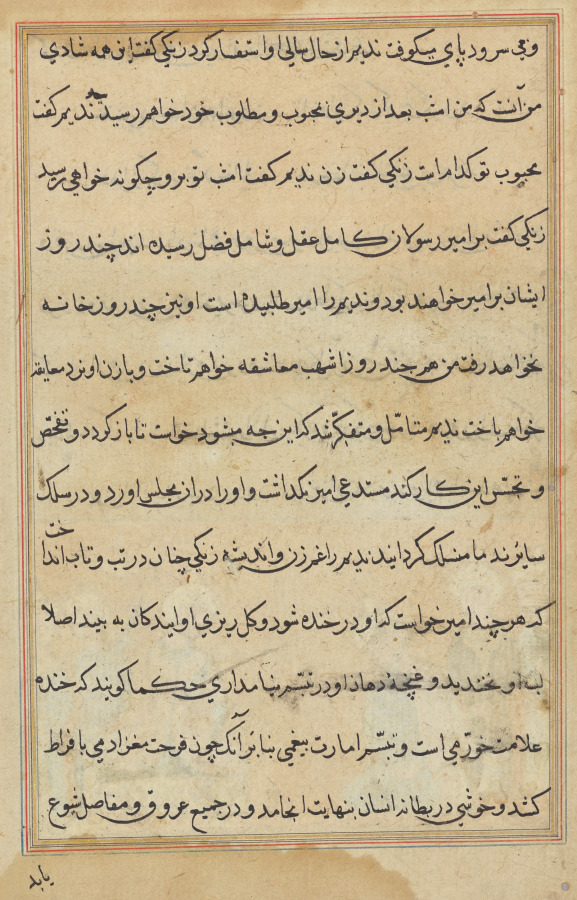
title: Page from Tales of a Parrot (Tuti-nama): text page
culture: Mughal India, court of Akbar (reigned 1556–1605)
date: c. 1560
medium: gum tempera, ink, and gold on paper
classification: Painting